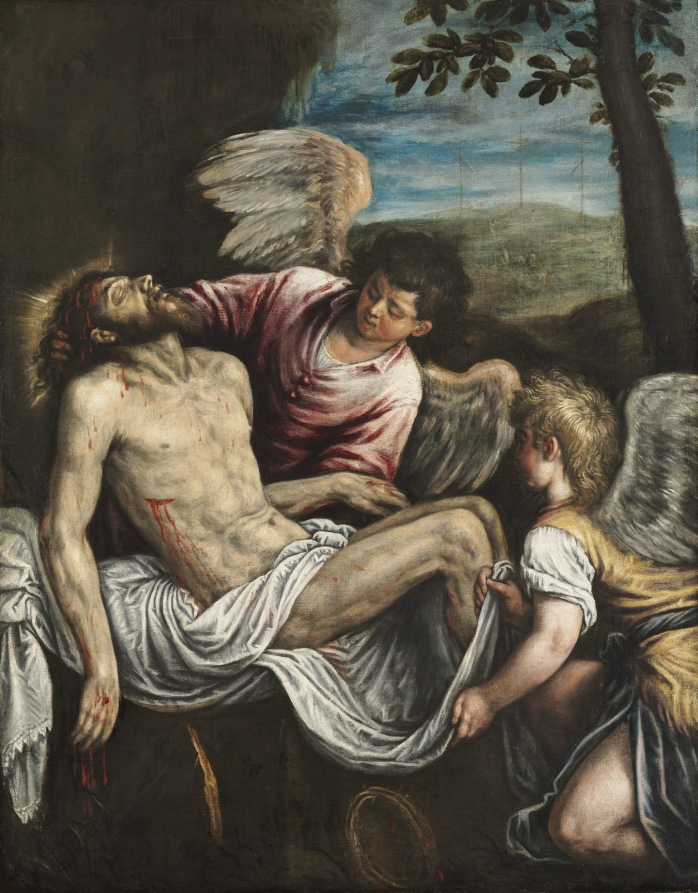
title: The Dead Christ with Angels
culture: Italy, 16th century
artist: Leandro Bassano (Italian, 1557–1623)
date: c. 1580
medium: oil on canvas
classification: Painting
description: In this scene, two angels are shown attending to the body of Christ after his death. The artist, Leandro Bassano, came from a family of painters—both his father and grandfather were artists, as were his brothers, Francesco and Gerolamo. Leandro worked primarily in Francesco's studio in Venice, which he took over after his brother's death in 1592. Leandro is best known as a portrait painter, working in a style often compared with that of the great Venetian artist, Tintoretto. Other versions of this painting are in the collections of the Galleria Colonna in Rome and the Civic Museum in Bassano del Grappa, the artist's birthplace.